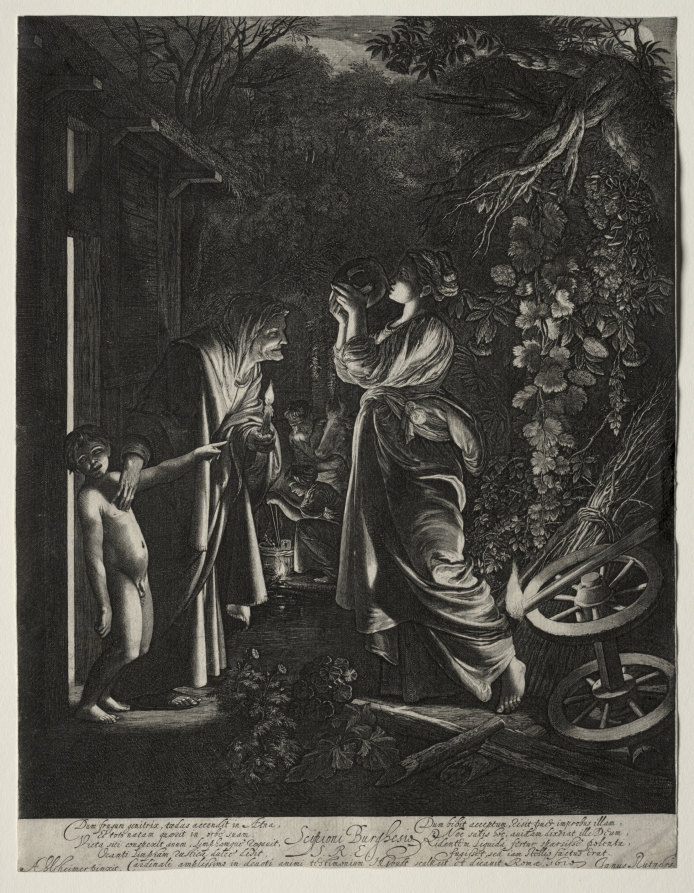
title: The Mocking of Ceres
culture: Netherlands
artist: Hendrik Goudt (Dutch, 1583–1648)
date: 1610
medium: engraving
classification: Print